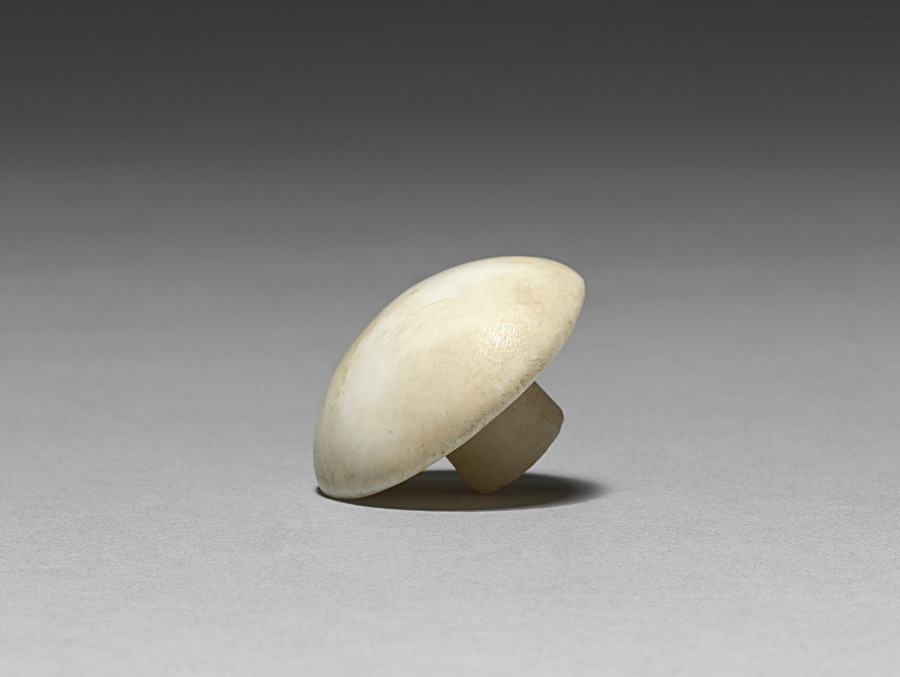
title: Earring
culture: Egypt, New Kingdom (1540–1069 BCE), Dynasty 18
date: 1540–1296 BCE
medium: travertine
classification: Jewelry